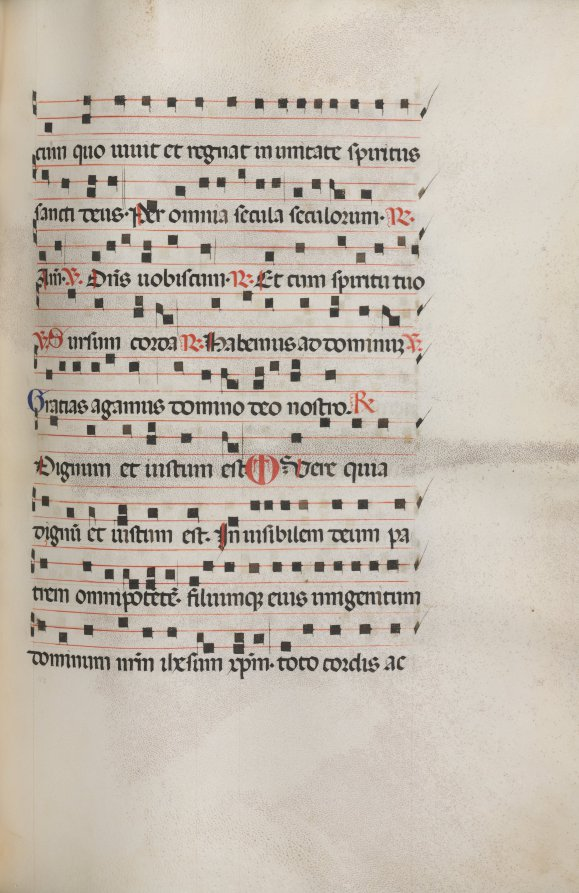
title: Missale: Fol. 154: Music for "Exultet"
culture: Italy, Perugia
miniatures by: Bartolommeo Caporali (Italian, c. 1420–1503)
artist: assisted by Giapeco Caporali (Italian, d. 1478)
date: 1469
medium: ink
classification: Bound Volume